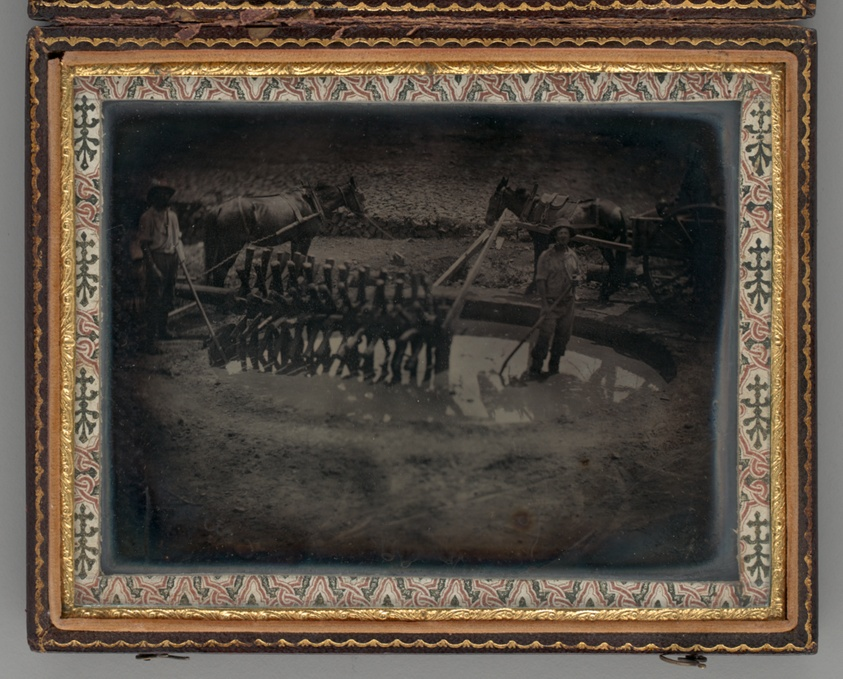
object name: Photograph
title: Untitled (Gold Washers)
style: 19th century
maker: Unknown maker; American, 19th century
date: 1853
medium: Daguerreotype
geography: United States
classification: portrait; daguerreotype; photography; photograph; photographic process; portrait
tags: lundberg collection, gold mining, gold rush